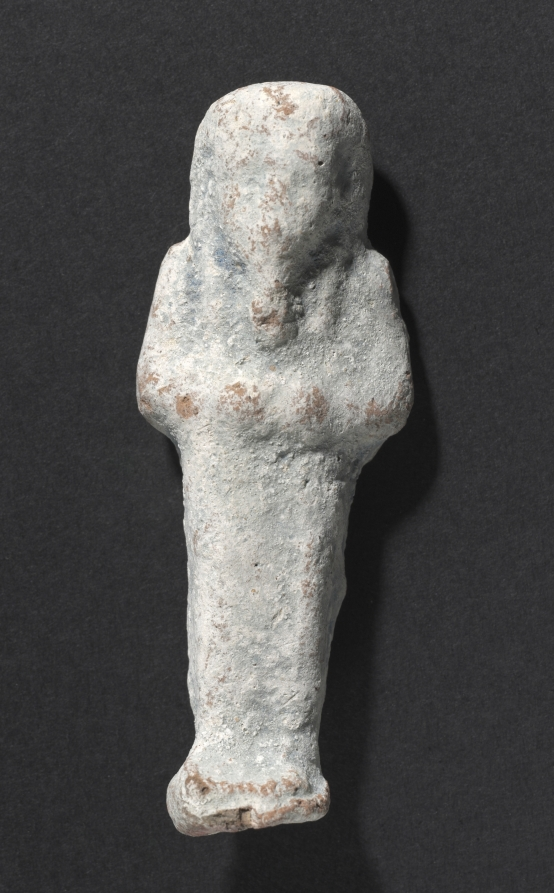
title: Shawabty of Ditamenpaankh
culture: Egypt, Late period (715–332 BCE), Dynasty 25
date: 715–656 BCE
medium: terracotta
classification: Funerary Equipment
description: High demand for shawabtys in the Late Period, a time when as many as 400 or more shawabtys were placed in the tomb with the deceased, gave rise to a specialized container for storing them: the shawabty box. This example is inscribed for the lady of the house, Ditamenpaankh, and was probably one of a pair originally made for her. The single-masted boat on the box's lid is perhaps an allusion to the pilgrimage of the deceased to the holy city of Abydos, the cult city of Osiris, king of the dead. The shawabtys inside are crude, mass-produced examples cast in an open mold. Made of terracotta, their blue paint imitates more costly shawabtys made of faience. As for the shawabty spell, it has been removed from its traditional location on the shawabty's front and relocated onto the sides of box, where it needed only to be written once, thus expediting production.